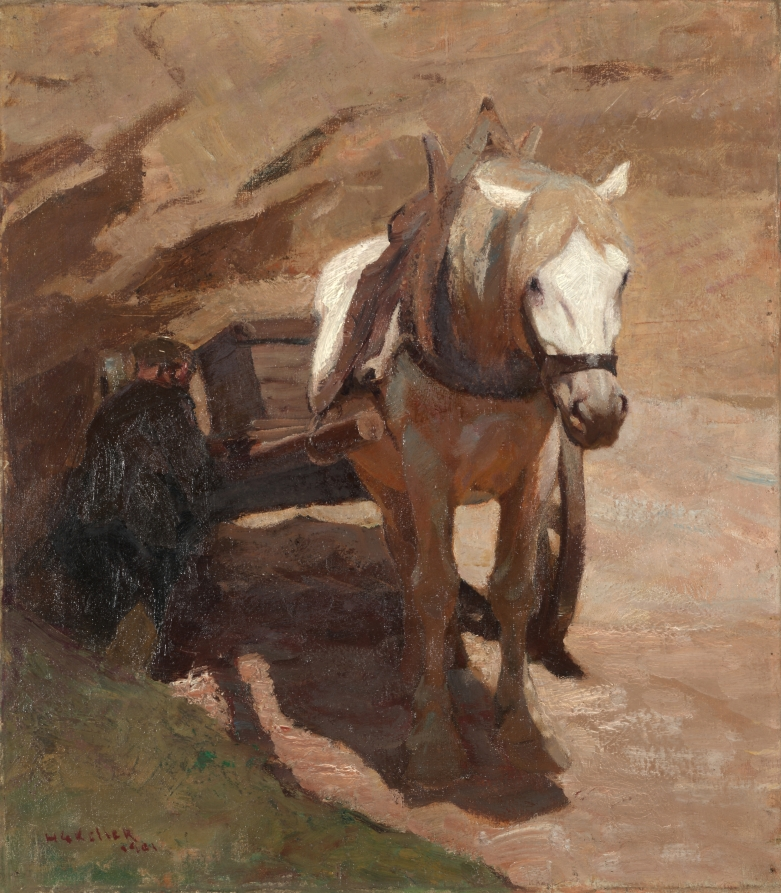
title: In the Sand-pit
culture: America, Ohio, Cleveland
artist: Henry Keller (American, born Germany, 1869–1949)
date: 1901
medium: oil on canvas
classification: Painting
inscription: signed lower left: H. G. Keller 1901.